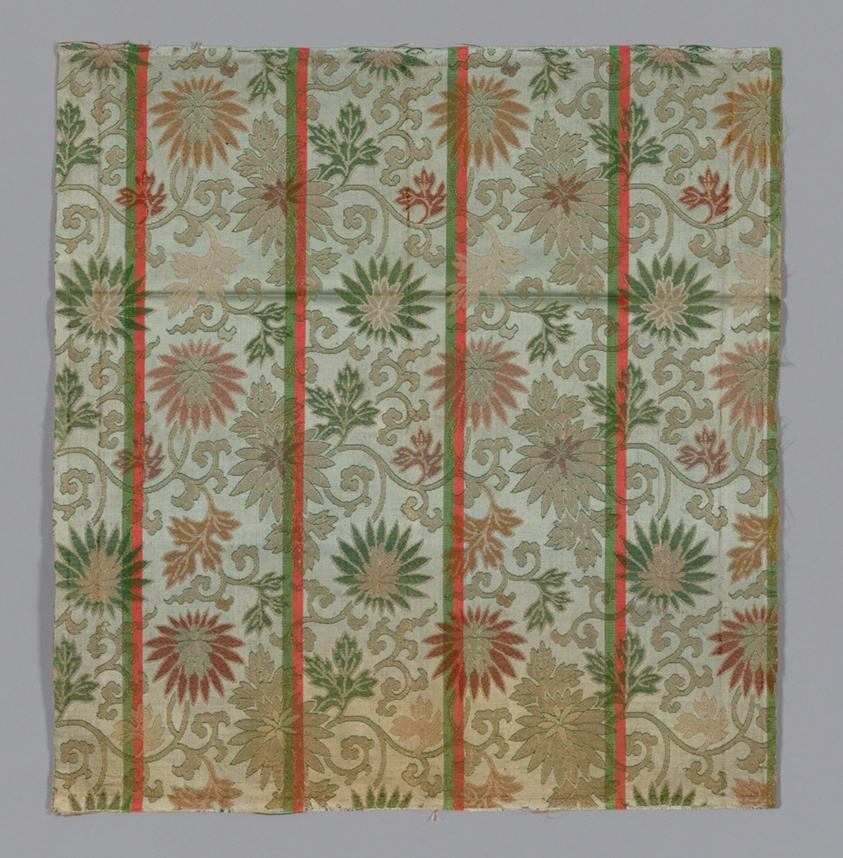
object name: Textile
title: Fragment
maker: Japan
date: late Edo period (1789–1868)/ Meiji period (1868–1912), 19th century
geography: Japan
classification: textile; weaving